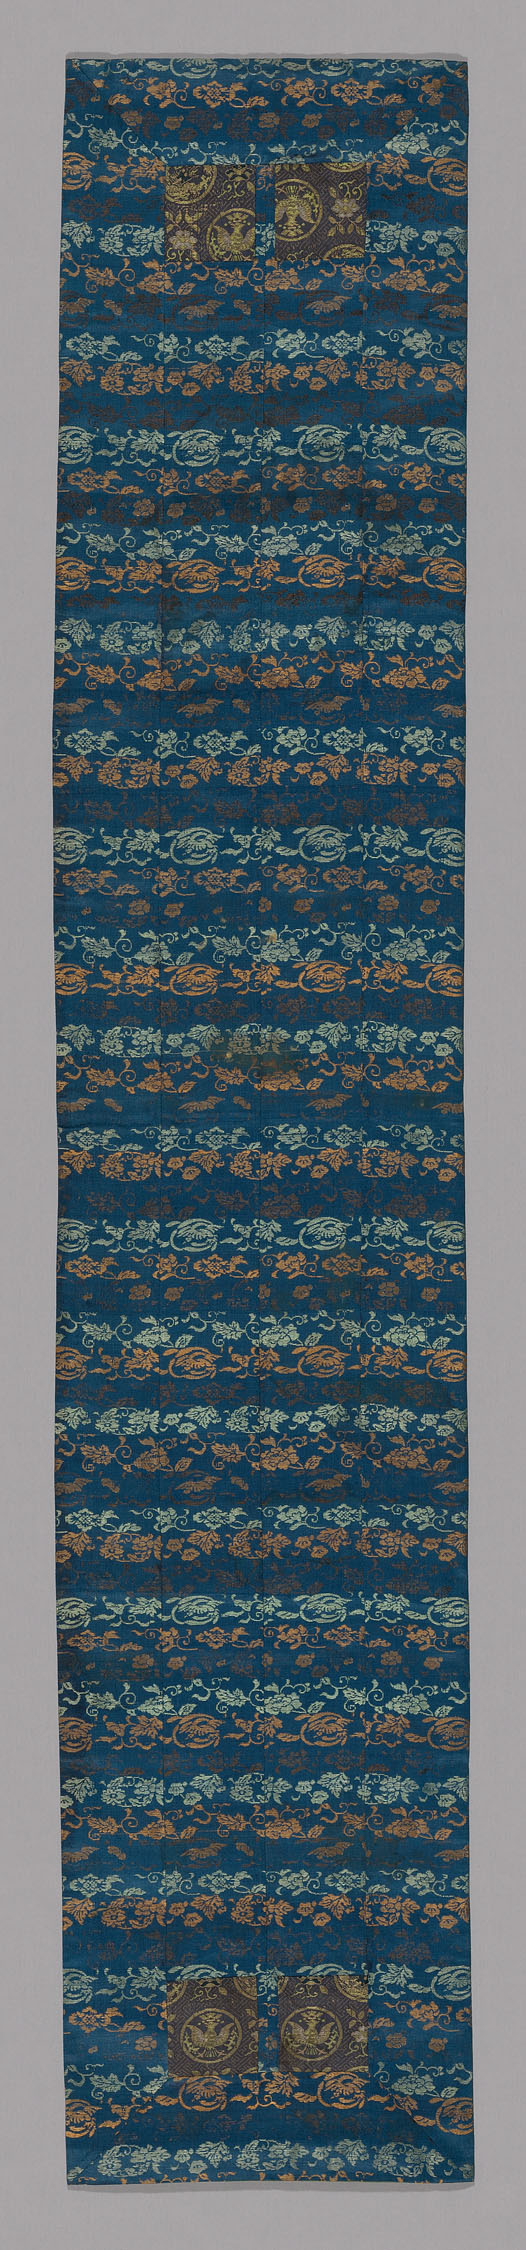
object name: Textile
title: Ôhi (Stole)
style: meiji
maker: Japan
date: Meiji period (1868–1912), 1875/1900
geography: Japan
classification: textile; weaving; liturgical - buddhist; costume